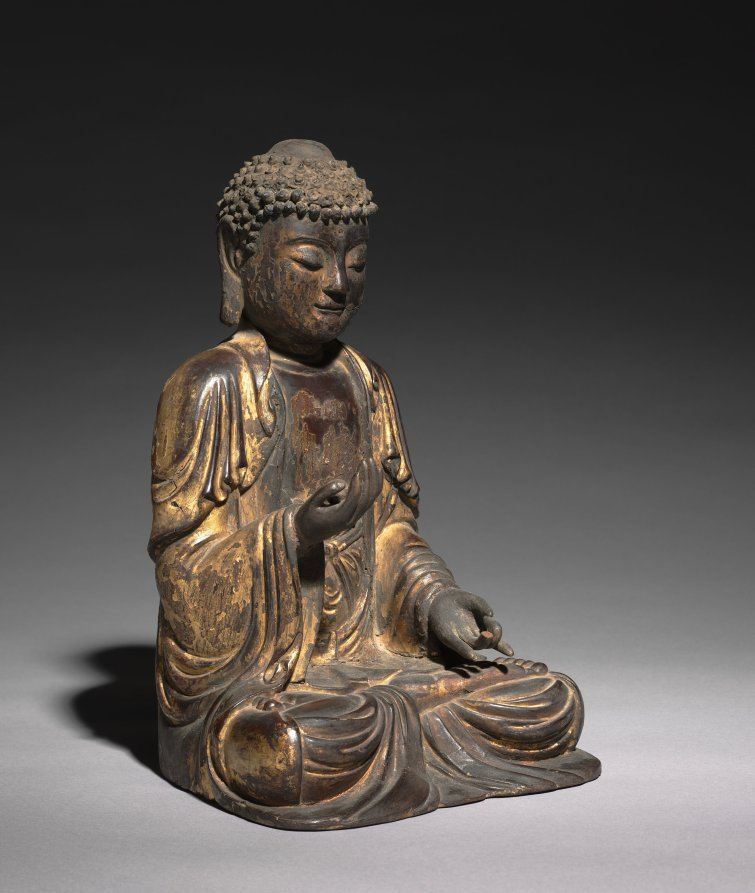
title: Seated Amitabha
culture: Korea, Goryeo dynasty (918–1392)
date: 1300s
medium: wood with lacquer and gilding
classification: Sculpture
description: In Buddhist art, buddhas (supreme beings who entered the world of nirvana) and bodhisattvas (compassionate beings committed to the attainment of enlightenment for others) are two main subjects. The religious role of buddhas and bodhisattvas—to lead all sentient beings to the realm of Buddhahood—is the same, yet visual languages to represent them is different. As shown in this statue, the Buddha is represented as a monk with shaven head and dressed in simple monastic robes. Bodhisattvas, on the other hand, are adorned with elaborate jewelry and a lock of long hair.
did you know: This Buddhist statue was donated to the museum in memory of Godfrey St. G. M. Gompertz (1904-1992), a pioneering scholar and collector of Korean art, in particular in the area of Goryeo-period celadons.